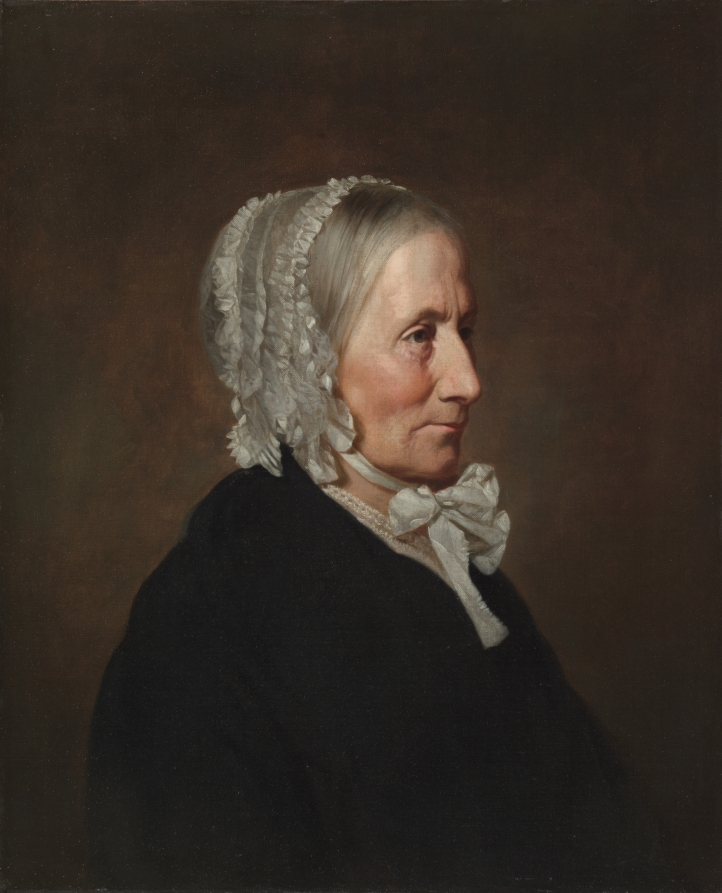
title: Portrait of the Artist's Mother (Lydia Wardwell Smith)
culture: America, Ohio, Cleveland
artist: Allen Smith, Jr. (American, 1810–1891)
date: probably mid-1800s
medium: oil on canvas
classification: Painting